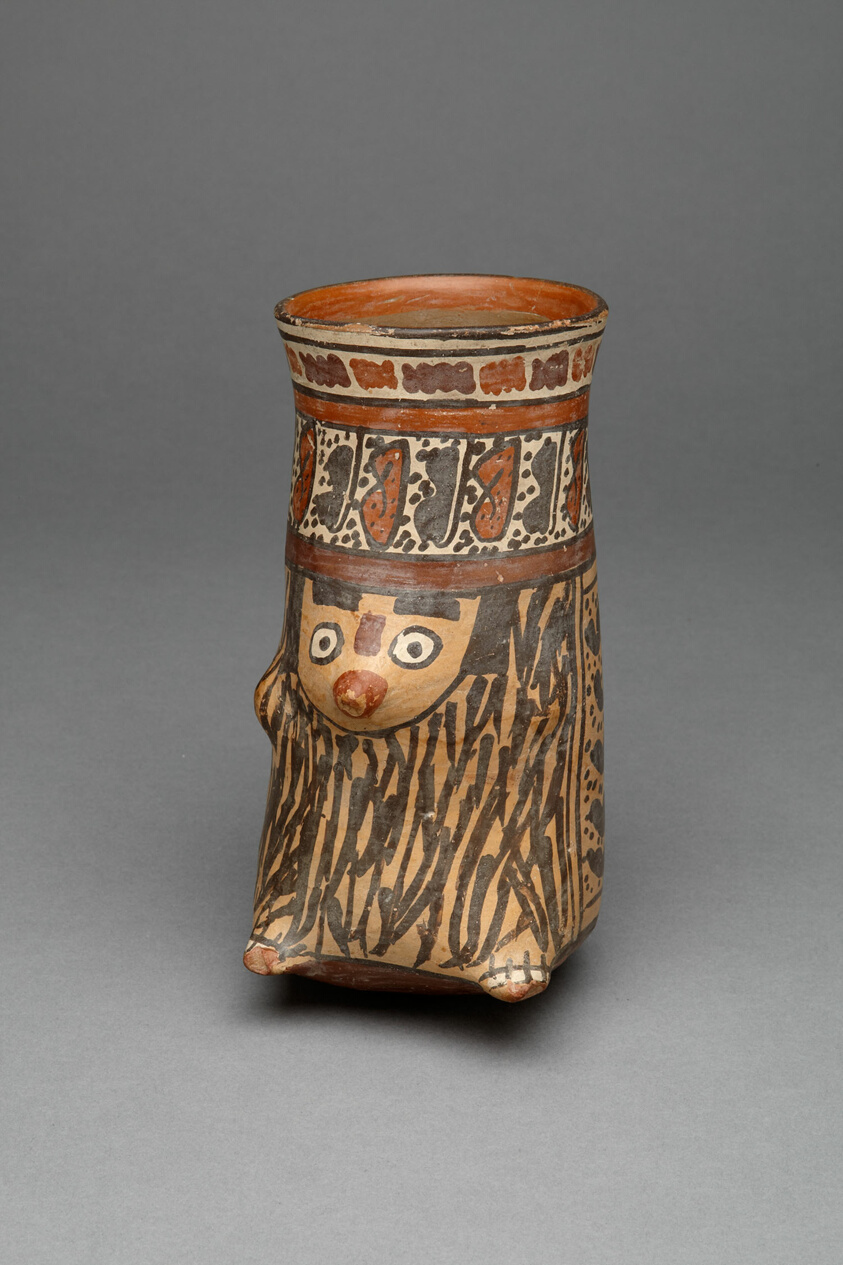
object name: Vessel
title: Beaker Molded in the Form of a Costumed Figure or Animal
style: nazca, early intermediate period, Pre-Columbian, americas, Arts of the Americas, andean, andes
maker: Nazca; South coast, Peru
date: 180 BCE–500 CE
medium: Ceramic and pigment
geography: Nazca Valley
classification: earthenware; art of the americas; ceramics; vessel